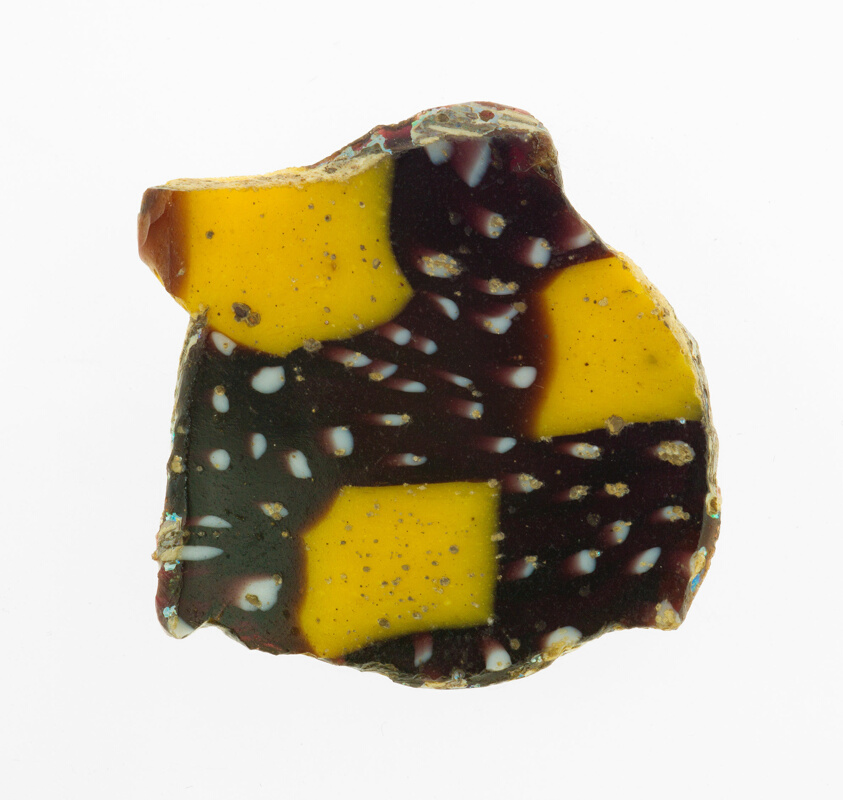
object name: Decorative Arts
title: Fragment of a Vessel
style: roman (ancient, style or period), ancient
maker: Roman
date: 1st century BCE–1st century CE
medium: Glass, mosaic glass technique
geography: Roman Empire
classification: fragment; decorative arts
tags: decoration